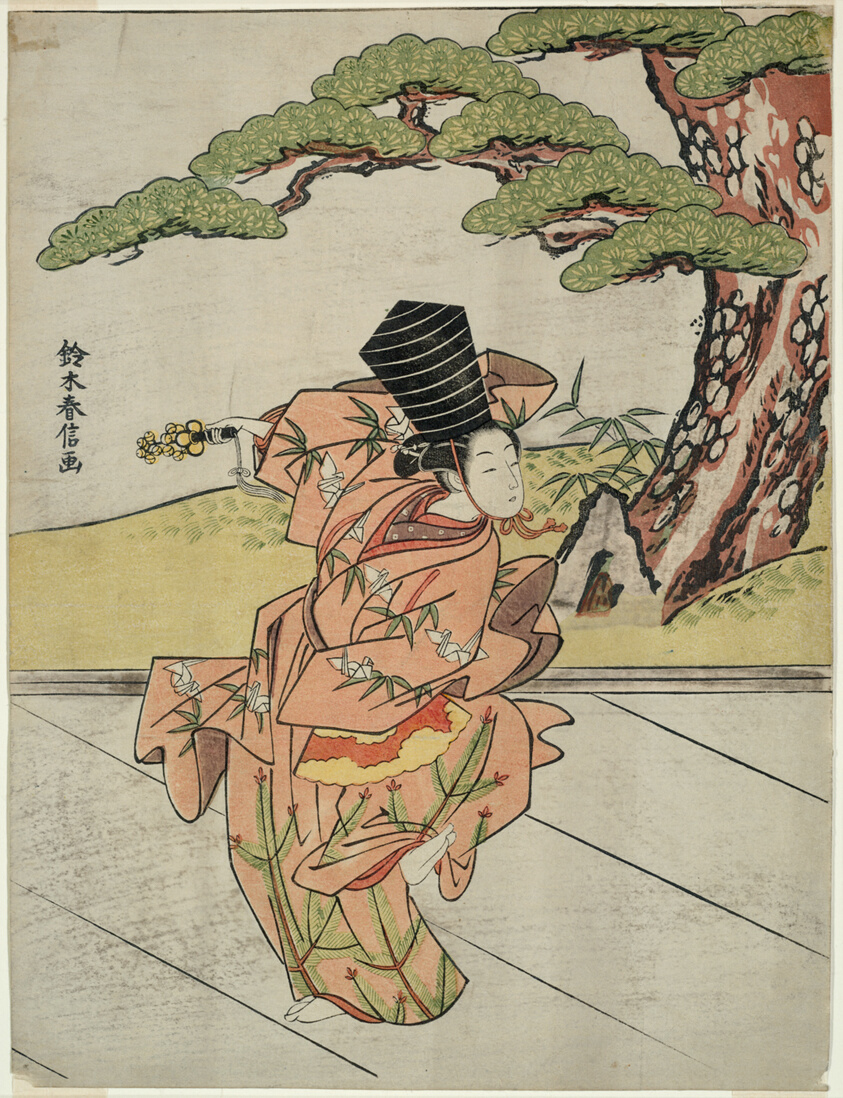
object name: Print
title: Female Sanbaso Dancer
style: Japanese (culture or style)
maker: Suzuki Harunobu 鈴木 春信; Japanese, 1725 (?)-1770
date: c. 1766/67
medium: Color woodblock print; chuban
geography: Japan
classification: woodblock print; print; asian art